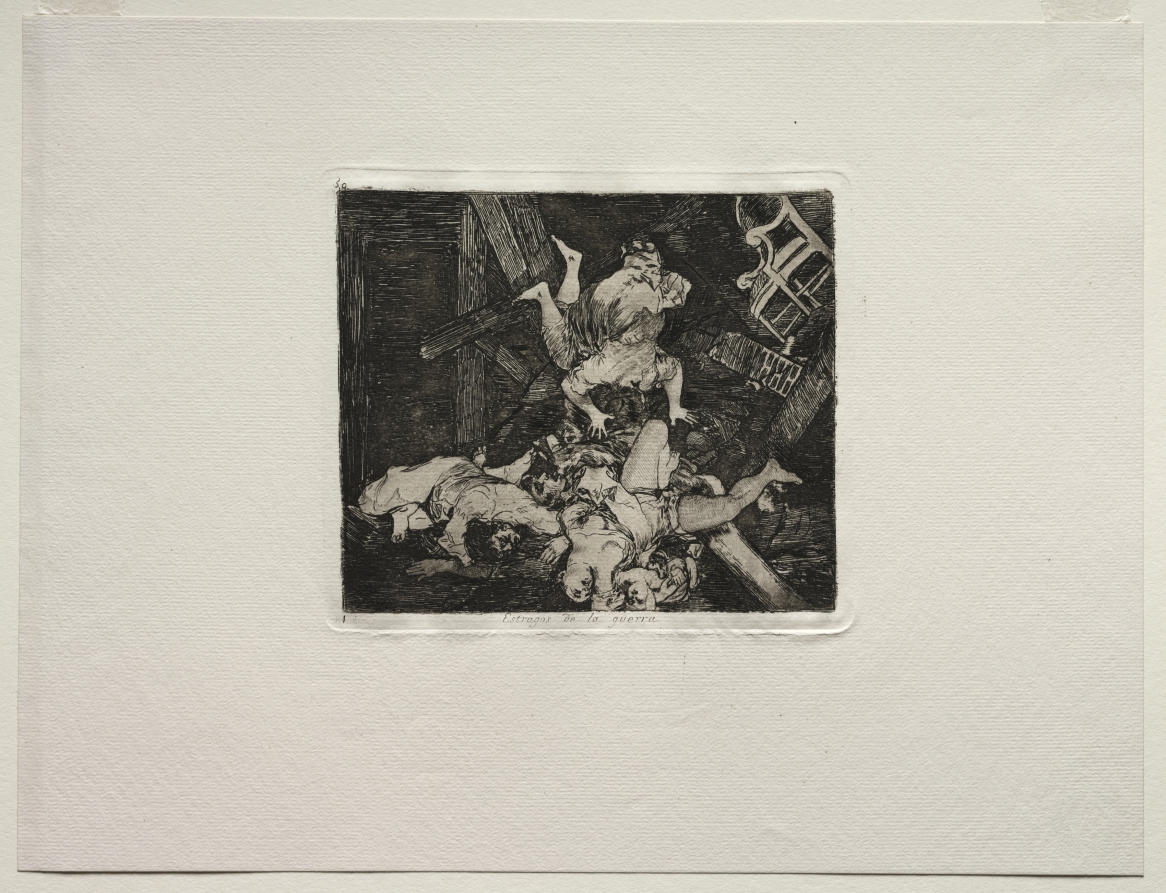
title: The Horrors of War: Ravages of War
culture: Spain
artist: Francisco de Goya (Spanish, 1746–1828)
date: 1810–20, published 1863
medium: etching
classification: Print